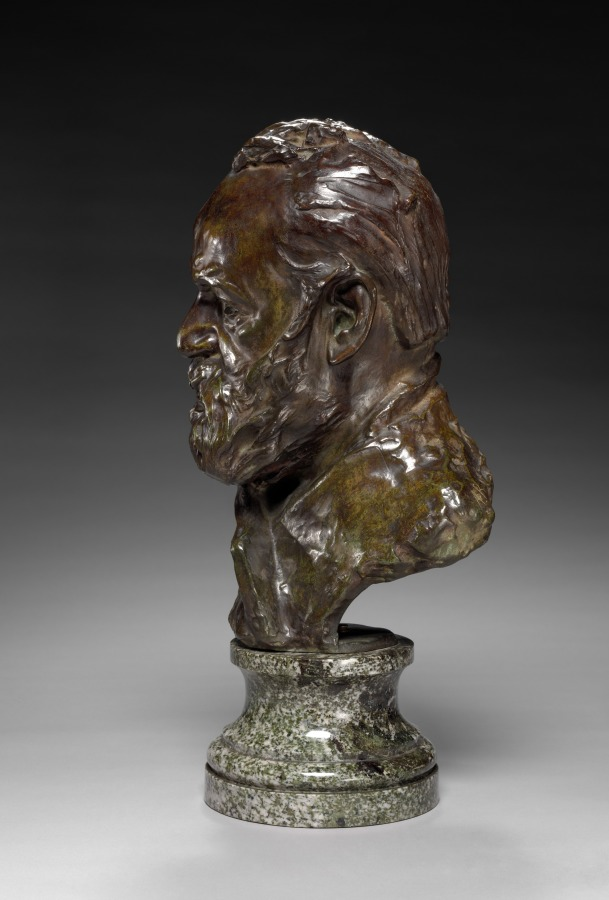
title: Bust of Victor Hugo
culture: France, 19th century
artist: Auguste Rodin (French, 1840–1917)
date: 1883 modeled; cast by 1917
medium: bronze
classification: Sculpture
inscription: inscribed on back: "A. Rodin" signed "Rodin" (back, lower left)